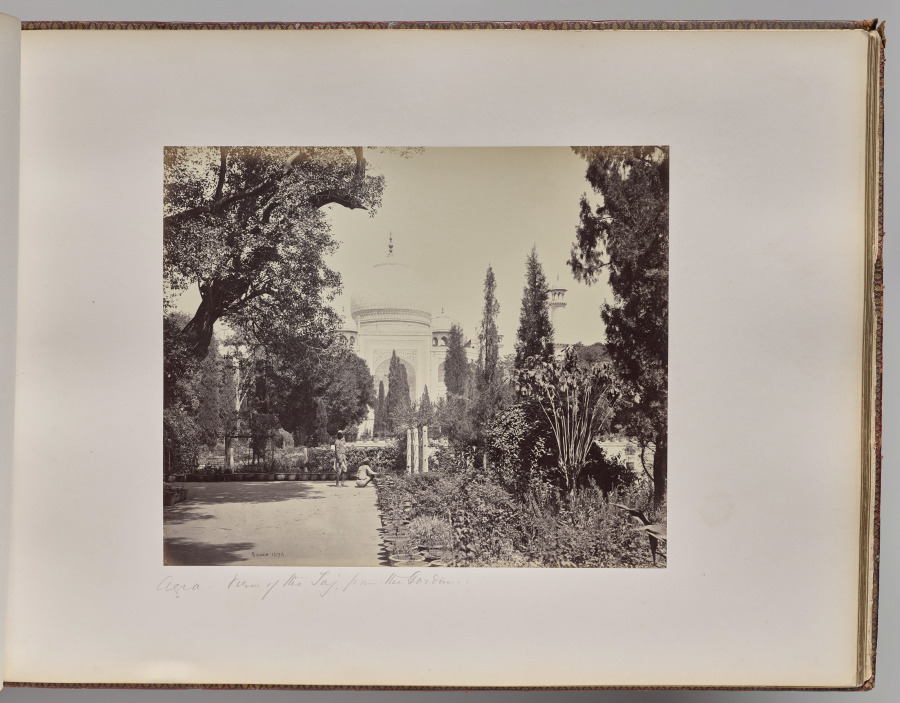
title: Agra. View of the Taj from the Garden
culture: England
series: Photographs of Northern India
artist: Samuel Bourne (British, 1834–1912)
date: 1863–70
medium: albumen print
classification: Photograph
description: The 50 images in this album, all taken in the 1860s, move from the hill towns of the Himalayas down to cities including Lahore (now in Pakistan), Delhi, Lucknow, Agra, Benares (now Varansi), and Calcutta (now Kolkata). Architectural studies of major monuments offer valuable historical records of what sites such as the Taj Mahal and the imperial mosque of the Mughal emperors in Delhi looked like before 20th-century restorations.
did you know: Samuel Bourne, the author of most the images in this album, was a banker in England before he moved to India to become a professional photographer.